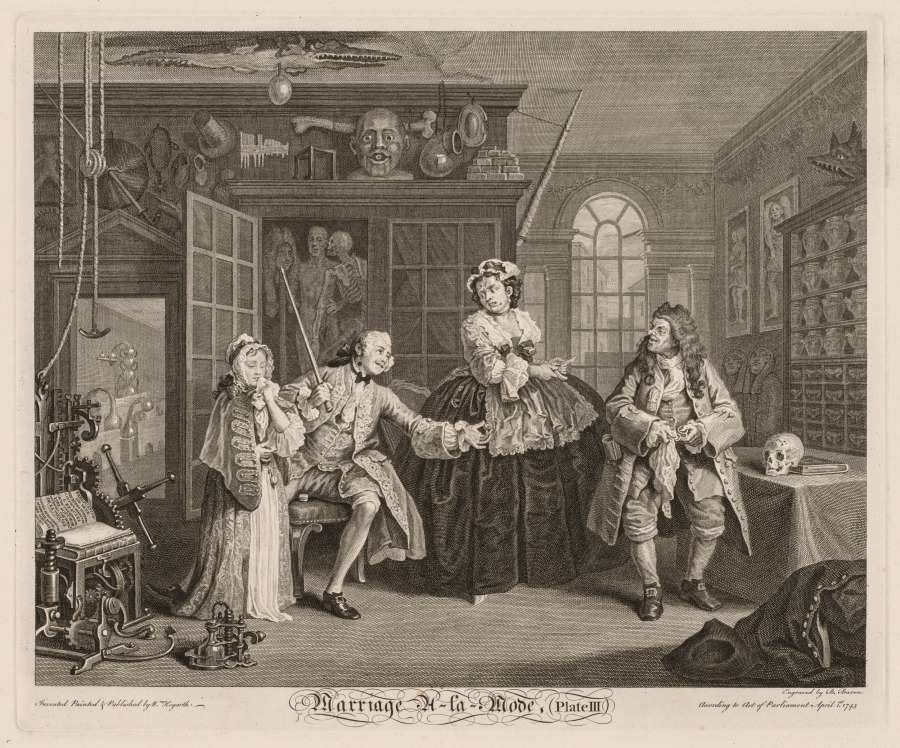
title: Marriage à la Mode: The Scene with the Quack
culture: England, 18th century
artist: William Hogarth (British, 1697–1764)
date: 1745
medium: engraving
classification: Portfolio